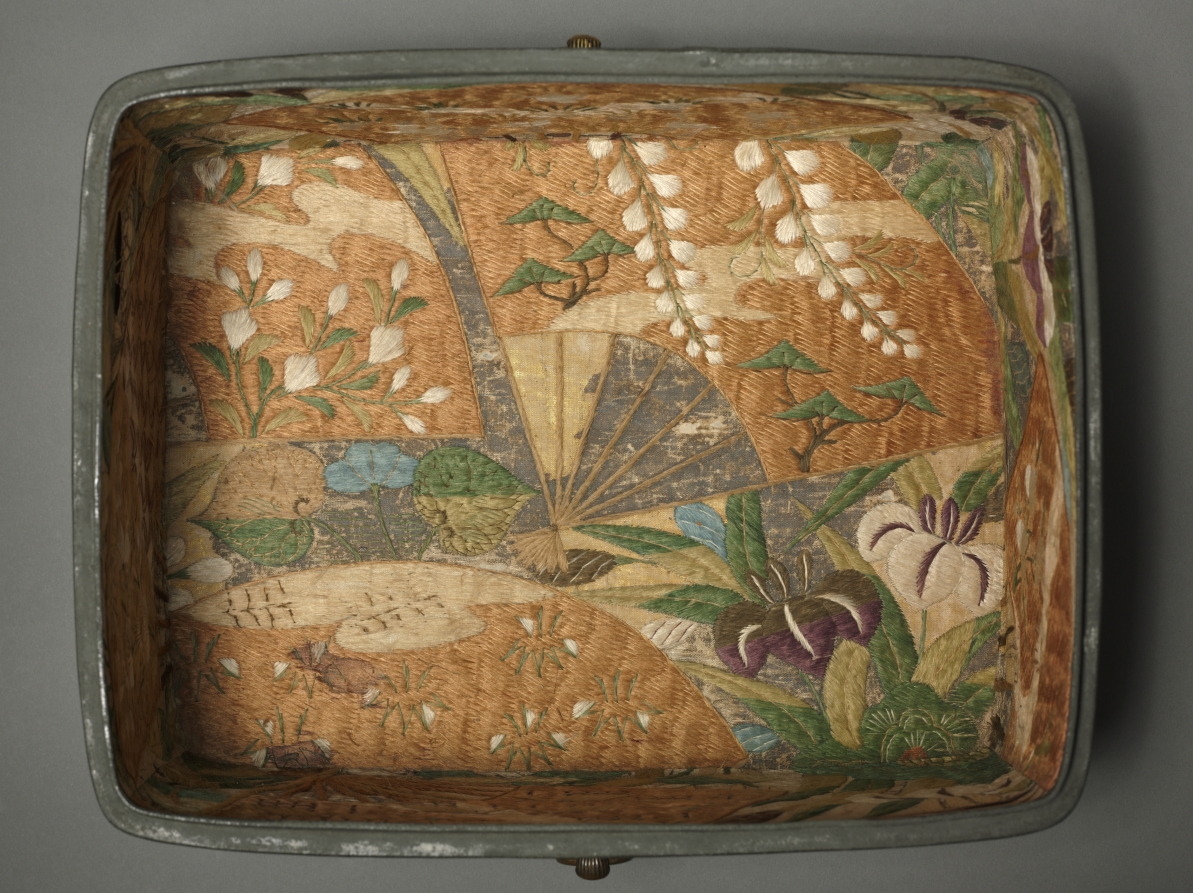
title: Cosmetics Box with Chrysanthemums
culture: Japan, Kamakura period (1185–1333)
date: early 1300s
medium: lacquer on wood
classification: Lacquer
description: In China, the chrysanthemum was historically appreciated for its association with the Double Nine Festival and the reclusive life of the poet Tao Yuanming (AD 365-427). In Japan, the 16-petaled chrysanthemum came to symbolize the Japanese imperial family after Emperor Gotoba (1180-1239) chose the motif as his personal emblem, having it applied to his sword and everyday utensils. This box proves that the flower also appeared on lacquer wares as early as the Kamakura period.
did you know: In Japanese, this type of small box is called a tebako, literally a hand box, and was typically part of a cosmetics set.